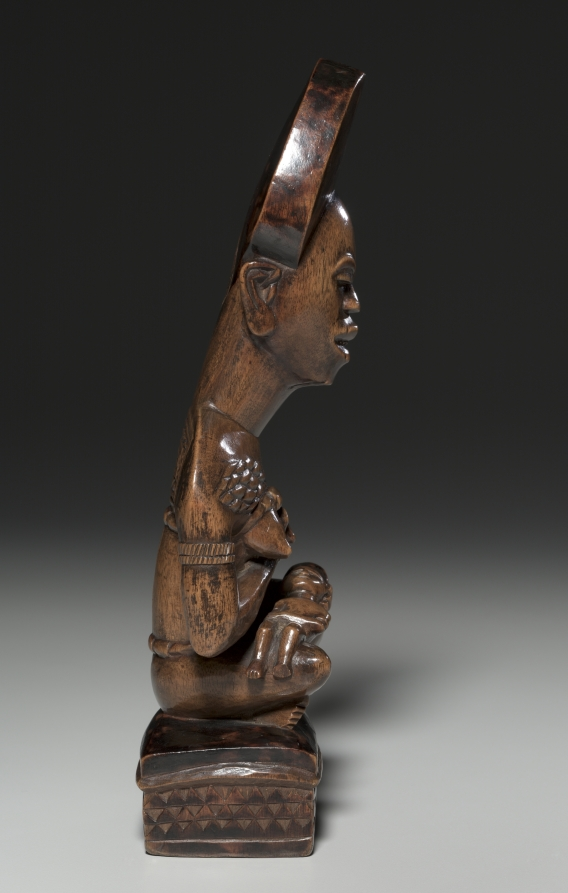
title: Woman and Child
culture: Africa, Central Africa, Democratic Republic of Congo, Yombe-style carver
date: mid- to late 1800s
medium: Wood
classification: Sculpture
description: This mother-and-child figure was probably part of a cult concerned with the treatment of infertility. Both her jewelry and her seated pose indicate that the woman occupied a high rank in her community. Her miter-shaped hairstyle, chiseled teeth, and raised body scars--considered to be marks of beauty and perfection--signal that the woman incarnates the founding ancestor of a kinship group.